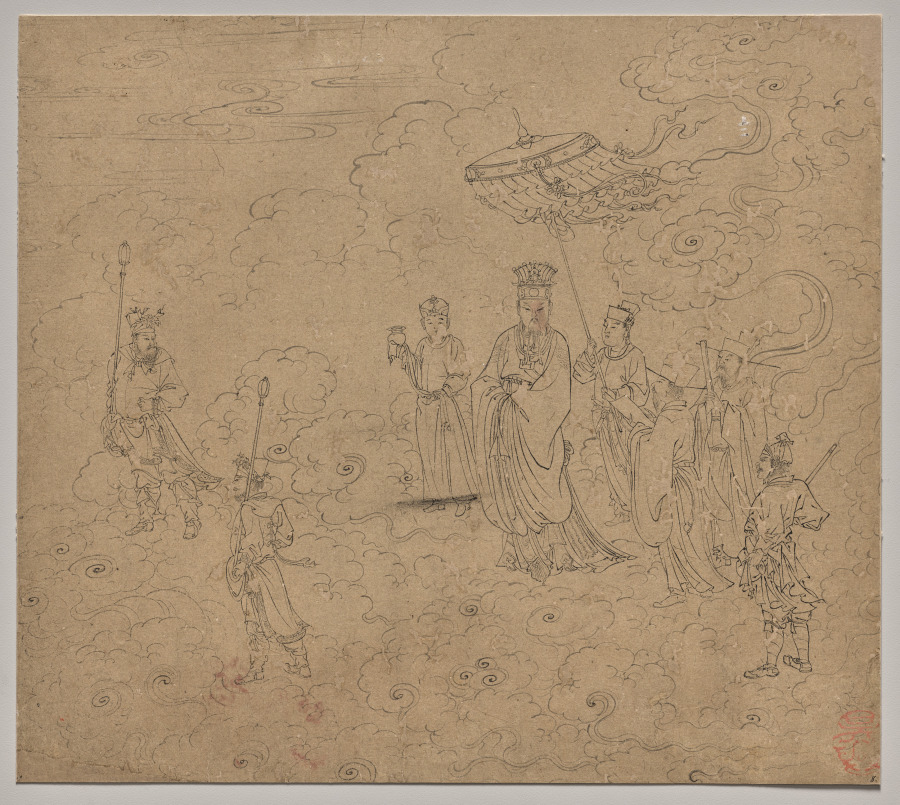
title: Album of Daoist and Buddhist Themes: Procession of Daoist Deities: Leaf 8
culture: China, Southern Song dynasty (1127-1279)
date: 1200s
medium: Album, ink on paper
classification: Painting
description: This extraordinary album has 50 paintings on a variety of religious subjects. They were likely created by several master craftsmen to share with studio apprentices as models for fulfilling commissions. The Jade Emperor and the Daoist pantheon make up the first 26 leaves. The next 14 leaves portray the Buddhist Ten Kings of Hell administering punishments to the dead. The third section, called “Clearing the Mountains,” features divine soldiers, led presumably by the deity Erlang Shen 二郎神, fighting undesirable creatures.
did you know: Six attendants escort a divine lord, likely one of the Five Emperors.